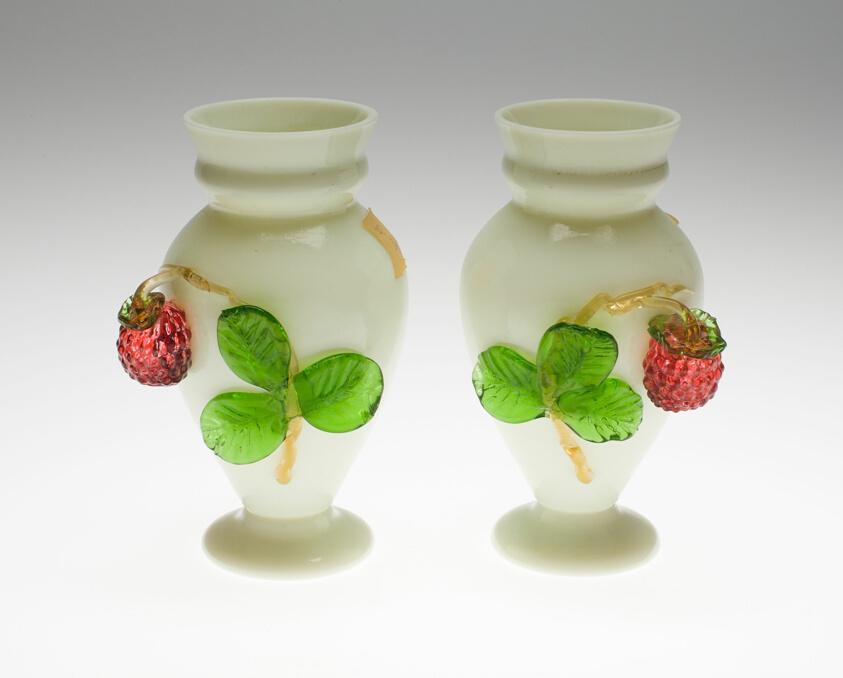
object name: Glass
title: Pair of Vases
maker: England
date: c. 1850/60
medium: Glass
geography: England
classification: vase; glass; vessel; european decorative arts